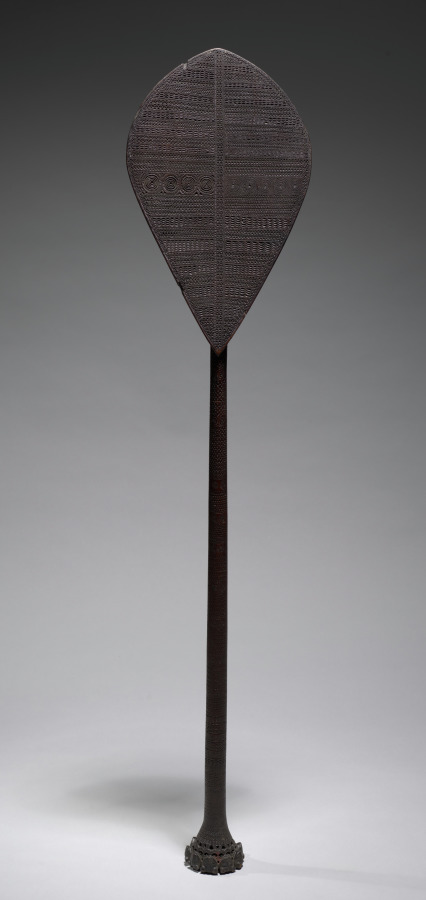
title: Ceremonial Paddle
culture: Polynesia, Ra'ivavae, Austral Islands, 18th-19th Century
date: 1700s-1800s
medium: wood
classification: Sculpture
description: Fine, chip-carved patterns cover the blades and shafts of Austral Islands ceremonial paddles. Squatting human figures carved around the butt are called tiki tiki tangata, meaning man-gods. The shafts of early paddles are usually round in cross-section; 19th-century examples are sometimes square. The function of the intricately carved Austral Islands paddles is uncertain. They may have been displayed on ceremonial occasions, such as dances, pageants, ancestral rituals, or inaugurations.